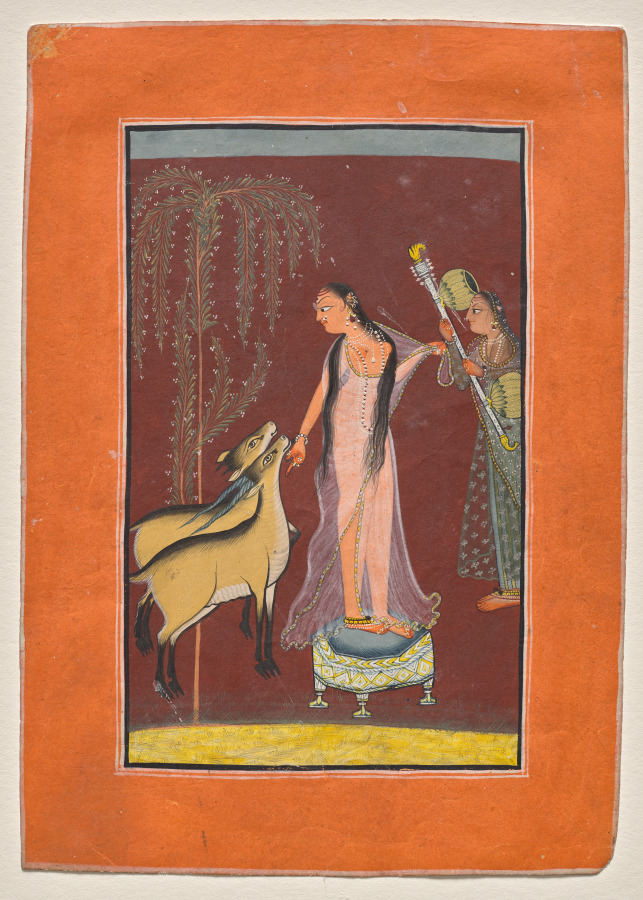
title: Heroine with attendant and a pair of deer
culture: Northern India, Pahari kingdoms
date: c. 1710–20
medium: gum tempera on paper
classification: Painting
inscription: D – 1200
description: A heroine’s ardor for her absent lover is so strong that it attracts a deer and doe, otherwise shy animals. The woman holding a stringed instrument at the right signals that this scene has a musical theme. Intensely staring gazes, the heroine’s elongated legs, the impossible turn of her head in the opposite direction as her feet, and the unaided dance of her hems add to the miraculous quality of the scene.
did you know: The lady fondling the deer is adorned in a transparent muslin shawl.